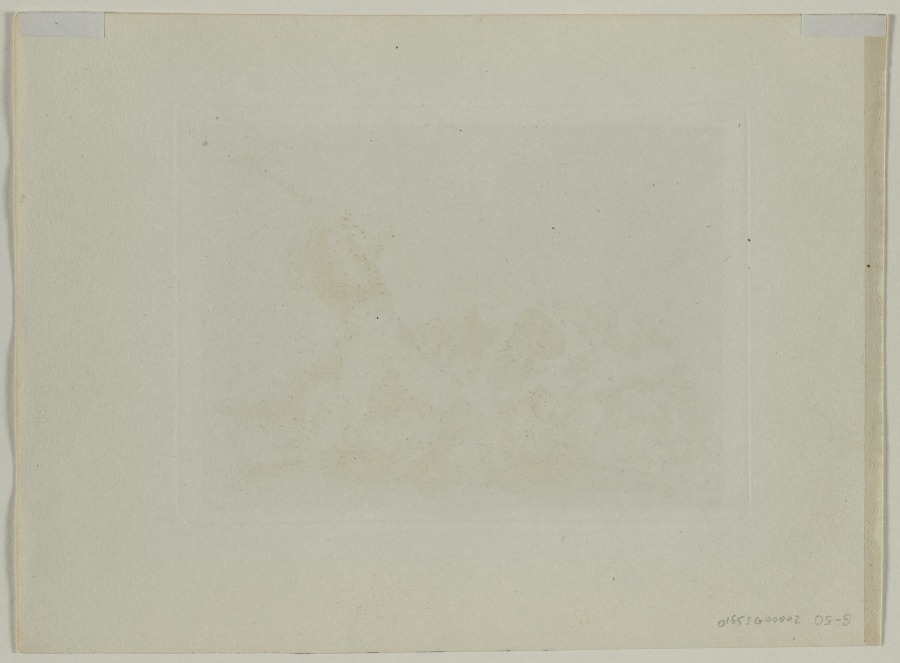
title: Disasters of War: Pl., 3, The Same (Thing)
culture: Spain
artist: Francisco de Goya (Spanish, 1746–1828)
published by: Real Academia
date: 1810–1813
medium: Etching and aquatint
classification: Print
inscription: In plate, below image, center: Lo mismo.; in plate, above image, upper left: 3; verso: lower right corner, in graphite: 01653G00002 and G-50 (upside down)